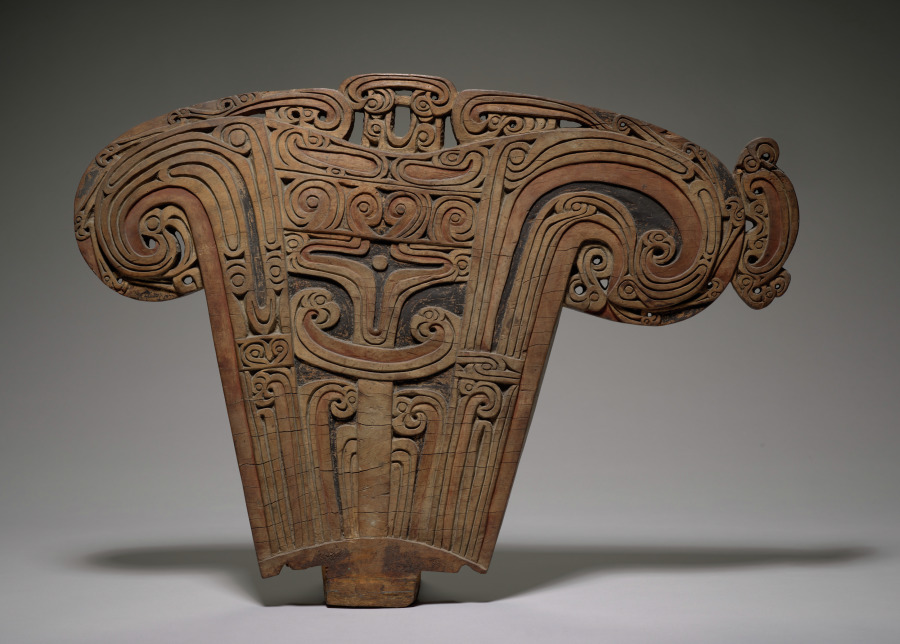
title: Canoe Splashboard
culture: Melanesia, Papua New Guinea, Massim Area, Trobriand Islands, 19th century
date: 1800s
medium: wood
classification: Sculpture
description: Trobriand Islanders often travel great distances by canoe to exchange ceremonial objects. Elaborately carved splashboards offered spiritual protection to the voyagers. Stylized frigate birds ornament this example.